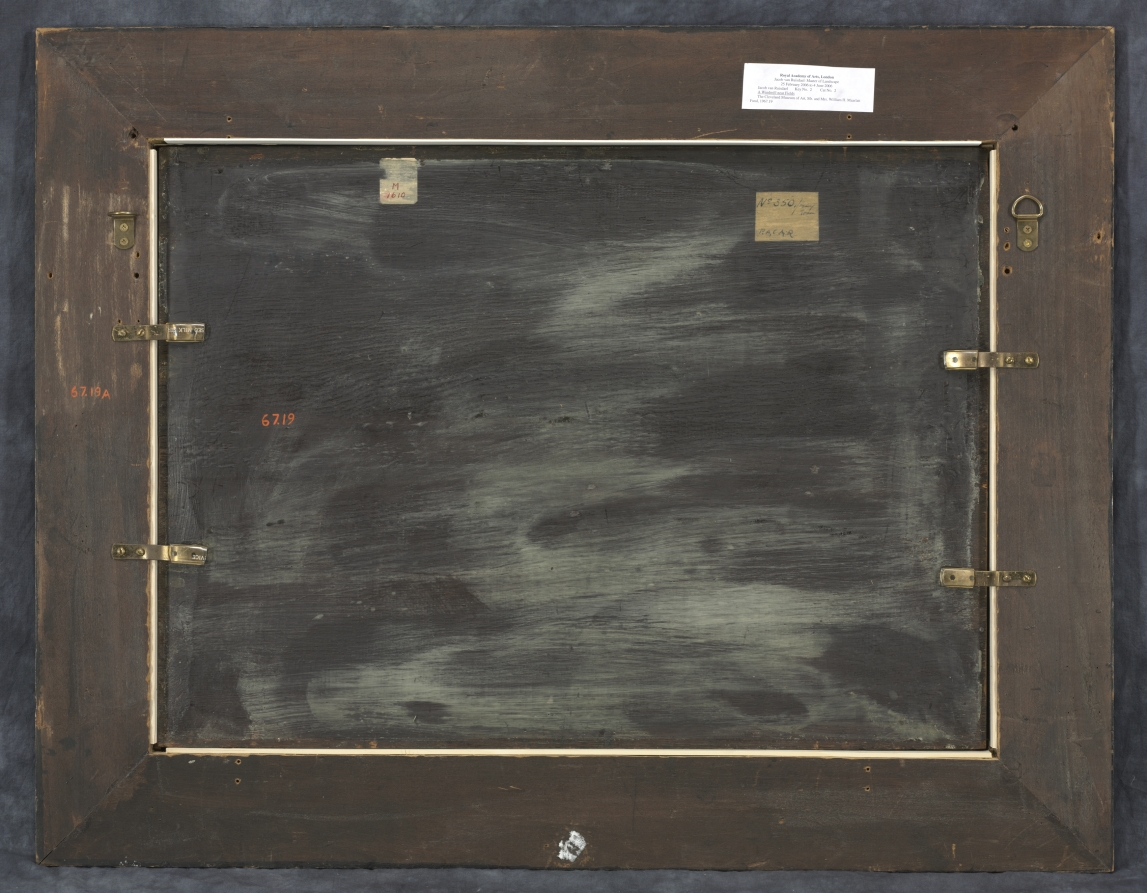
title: Landscape with a Windmill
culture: Netherlands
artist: Jacob van Ruisdael (Dutch, 1628/29–1682)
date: 1646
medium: oil on wood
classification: Painting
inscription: Signed lower right: "JvR 1646 [JvR in monogram]"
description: Even this early work by Jacob van Ruisdael—painted while he was still a teenager—shows his unique approach to landscape that made the simplest motifs seem grand and heroic. Dark forms are massed in the foreground, creating a stark contrast to the expansive, sunlit plain at left.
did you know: Look closely at the field across from the windmill: white linens are naturally bleached in the sun, a process that would have taken several months.